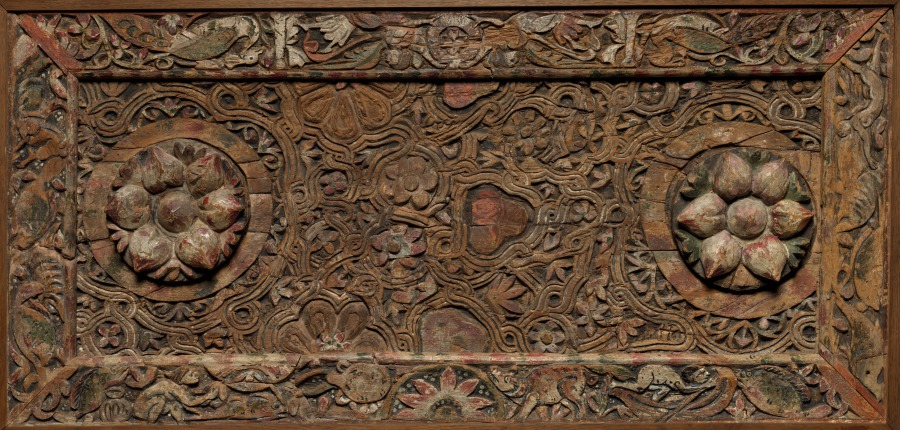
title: Ornamental Panel (from a Ceiling?)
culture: Egypt, Coptic period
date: 500s (frame) and 700s (central panel)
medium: wood with paint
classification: Furniture and woodwork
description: This wooden panel and its frame come from different locations. The four narrow panels forming the outer frame are stylistically datable to the 500s. The large central rectangular panel might date to the 700s. It is most likely a carved ceiling, but its architectural context is unknown. Both panel and frame have been cut down and joined together at some point in their history under unknown circumstances. The decorative program of the main panel features two large rosettes surrounded by florets, leaves, and fruit. The outer frame features two flying angels holding a wreath, a peacock, an octopus, a seated fisherman who holds a long line with a fish attached, and a swimming boy with a dolphin. The vocabulary of the frame is dominated by water life, particularly of the Nile and its banks. Though separated from its original place and altered, this important object provides a welcome glimpse of an architectural interior from early Christian Egypt.